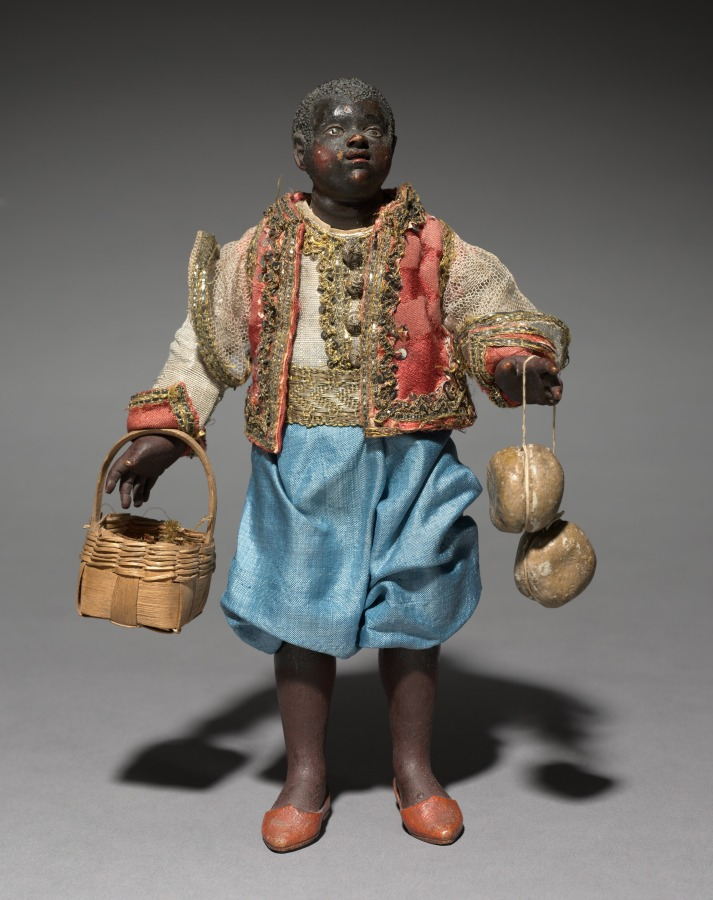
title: Figure from a Crèche: Attendant of the Magi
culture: Italy, Naples, late 18th-early 19th century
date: 1780–1830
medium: painted wood and terracotta with various textiles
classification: Sculpture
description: The practice of creating scenes of the Nativity for the home dates from the early 1700s in Italy, where people began to set up doll-like figures of about a foot or less in height. The custom was particularly popular in Naples around 1800, where crèche scenes (crèche means cradle, or crib) included many figures, whose heads and hands of painted terracotta, stuffed cloth bodies, and clothing adapted from contemporary local costumes gave them an amazingly realistic character. Representations of the birth of Jesus can be traced to the first few centuries of Christianity. Both living creatures and sculptural depictions of them were used from early times. By the late middle ages it was customary to create life-size figures of wood or stone, naturalistically painted, to represent the characters who participated in the events of Jesus's early life. These sculptures were then arranged in scenes illustrating one or both of the most important of these events, the Adoration of the Shepherds and the Adoration of the Magi-the three kings from the East who came to pay homage to the Christ child. Used in churches, these large figures were especially popular in Italy, Central Europe, Spain, and Portugal. This Object in Focus presentation was organized by Henry Hawley, Curator of Renaissance and Later Decorative Arts and Sculpture.